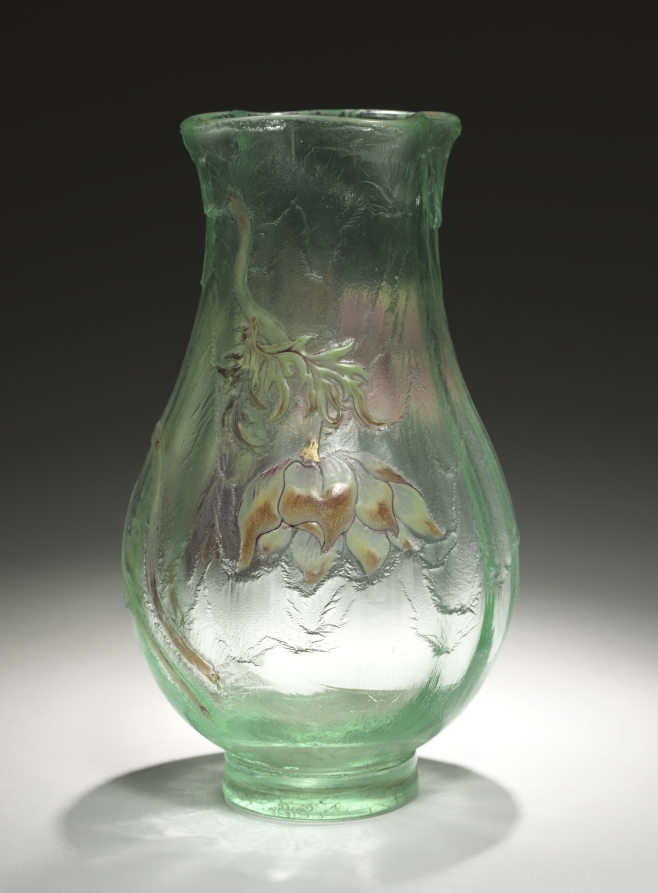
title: Vase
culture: France, early 20th Century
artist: Emile Gallé (French, 1846–1904)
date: c. 1900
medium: enameled glass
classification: Glass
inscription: etched on bottom: Gallé/deposé/G.G.